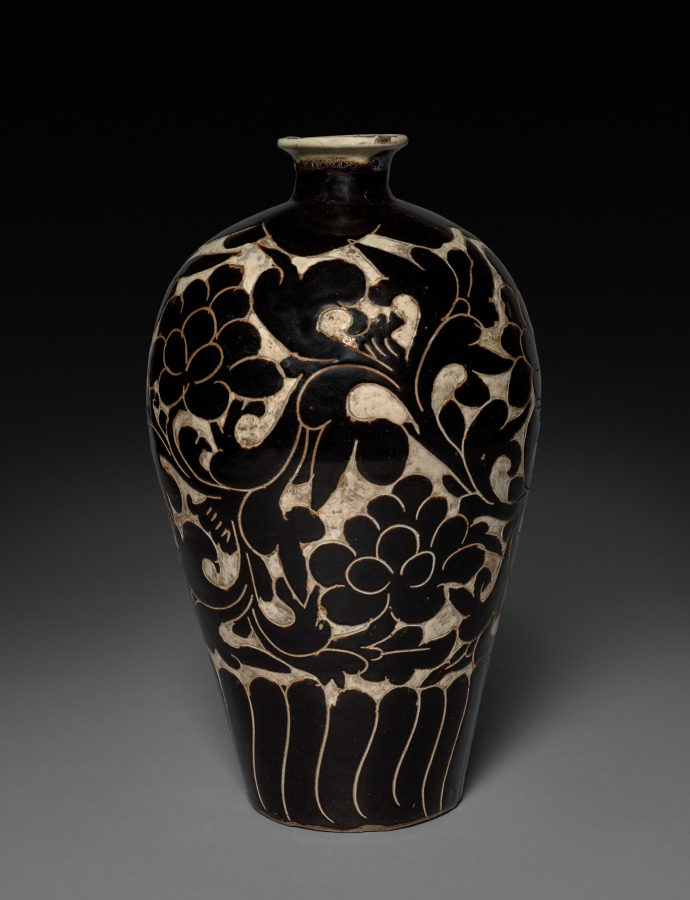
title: Vase with Peony Decoration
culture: China, Northern Song dynasty (960-1127)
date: 1000s-1100s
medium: Gray stoneware with underglaze slip decoration, Cizhou ware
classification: Ceramic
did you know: The thick foot rim is unglazed, while the shallow recessed flat base is covered with white slip and chance accumulations of underglaze pigment.